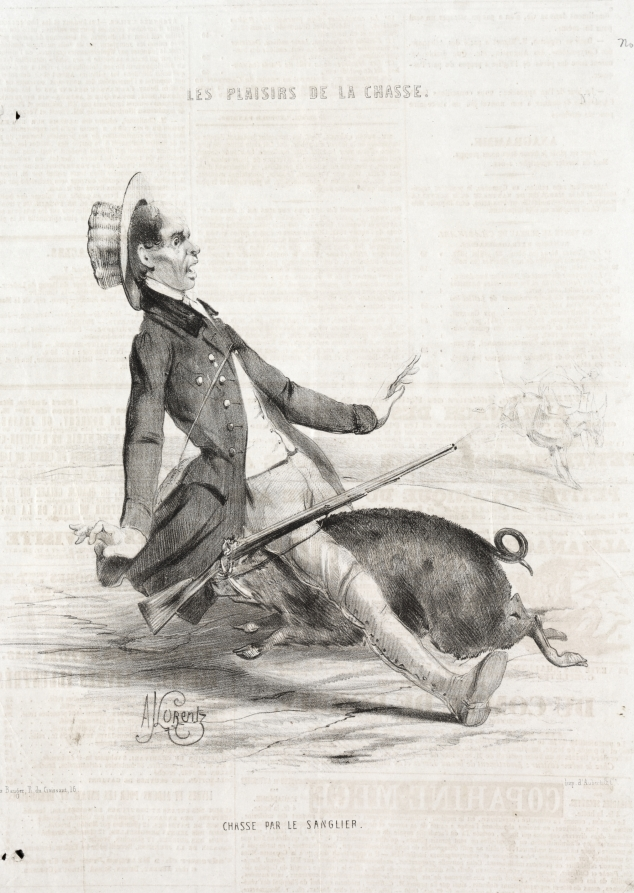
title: Les Plaisirs de la chasse: Chasse par le sanglier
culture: France, 19th century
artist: Alade Joseph Lorentz (French, 1813-after 1858)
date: 1842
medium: lithograph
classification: Print